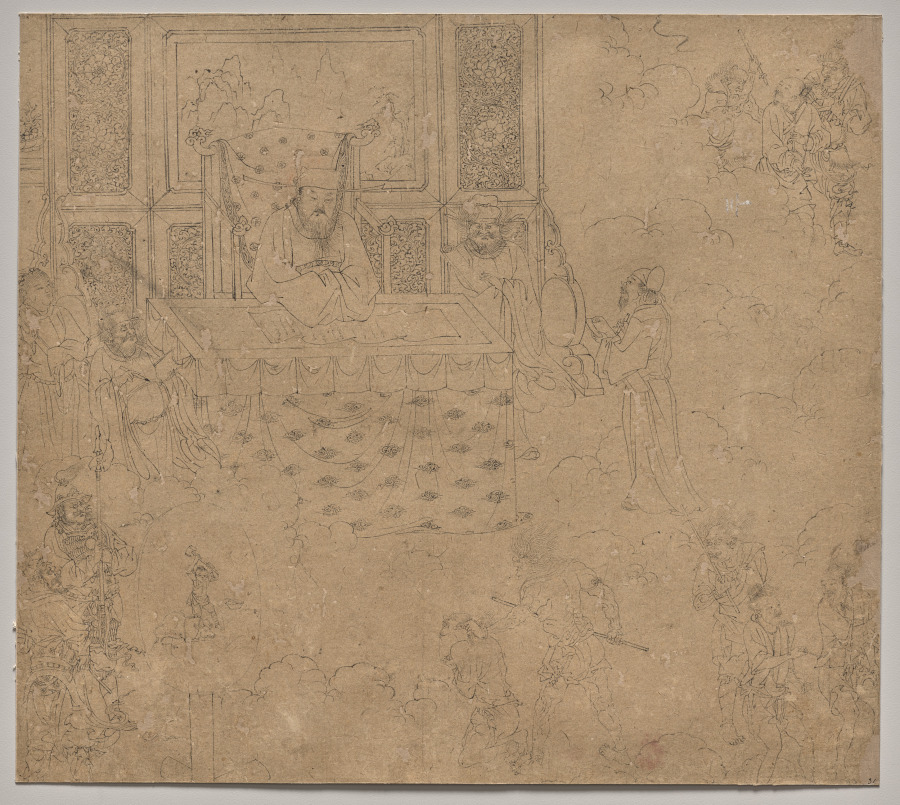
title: Album of Daoist and Buddhist Themes: Kings of Hells: Leaf 31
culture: China, Southern Song dynasty (1127-1279)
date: 1200s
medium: Album, ink on paper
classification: Painting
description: This extraordinary album has 50 paintings on a variety of religious subjects. They were likely created by several master craftsmen to share with studio apprentices as models for fulfilling commissions. The Jade Emperor and the Daoist pantheon make up the first 26 leaves. The next 14 leaves portray the Buddhist Ten Kings of Hell administering punishments to the dead. The third section, called “Clearing the Mountains,” features divine soldiers, led presumably by the deity Erlang Shen 二郎神, fighting undesirable creatures.